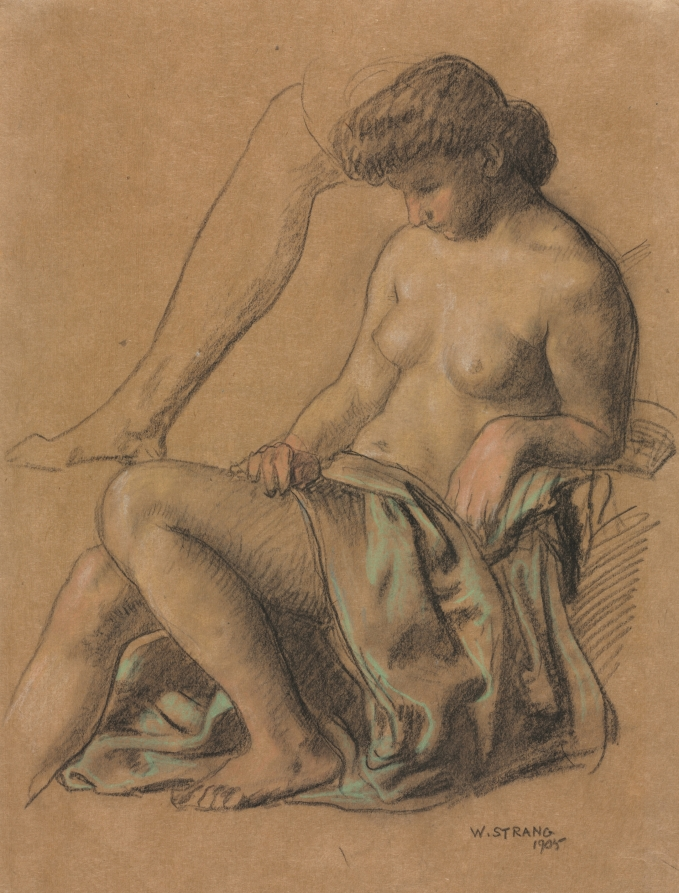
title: Draped Figure Seated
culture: England, 19th century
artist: William Strang (British, 1859–1921)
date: 1905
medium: charcoal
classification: Drawing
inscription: Signed in charcoal, lower right: "W. Strang 1905"